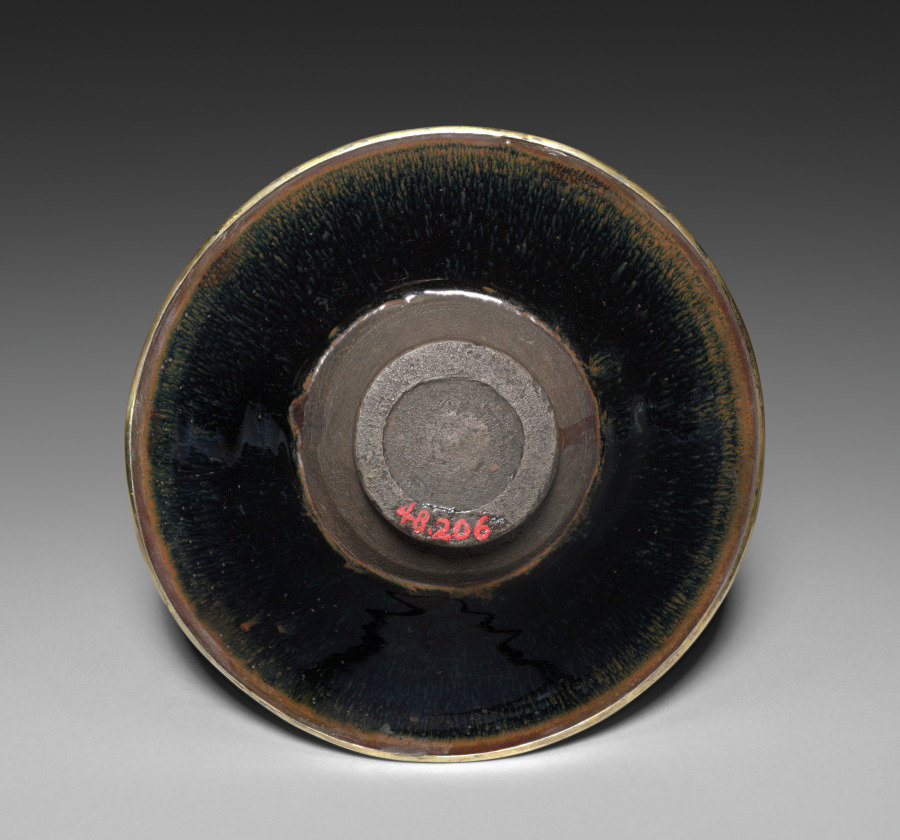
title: Tea Bowl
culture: China, Fujian province, Southern Song dynasty (1127-1279)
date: 1100s–1200s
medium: Stoneware with black “hare’s fur” glaze and metal-bound rim, Jian ware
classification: Ceramic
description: Due to its exceptional size, this Fujian tea bowl is rather rare. The enjoyment of Jian ware rests with the glaze transmutation due to iron in the glaze, which developed into reddish-brown streaks and spots against a rich black glaze after firing. Connoisseurs called these iron formations "hare’s fur" marks, and the ware was very popular with the tea cultures in China and Japan.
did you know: The reddish-brown streaks and spots have been affectionately termed "hare's fur" among connoisseurs.